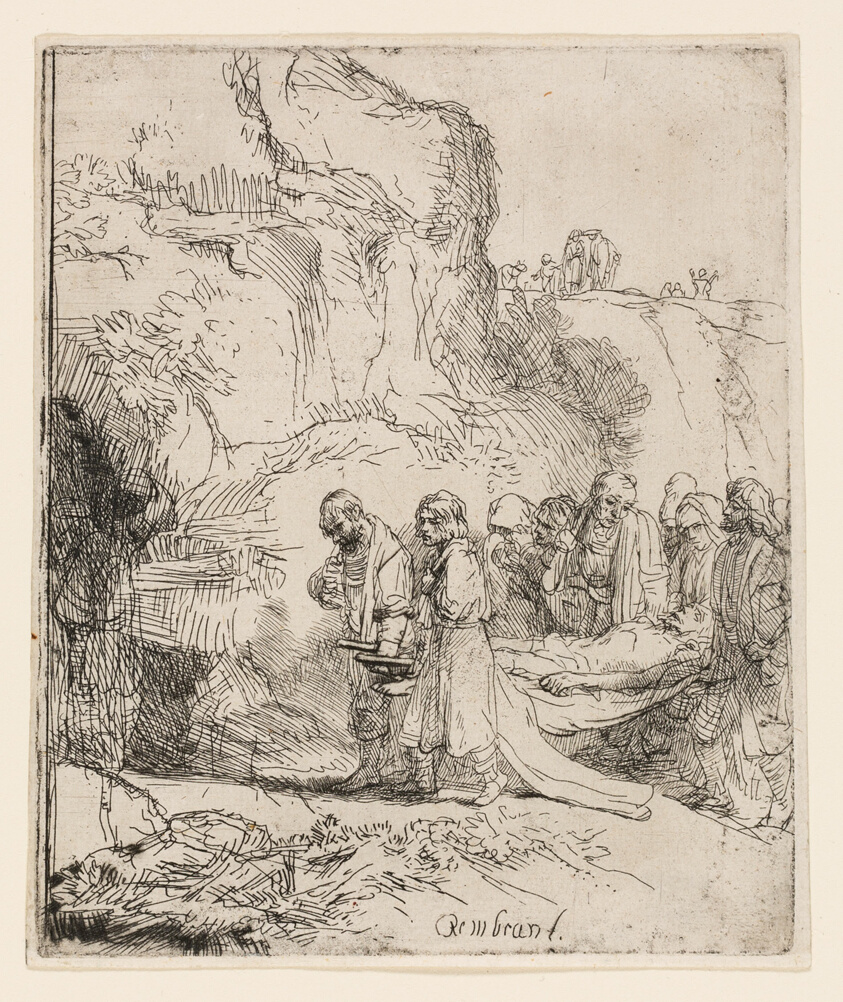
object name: Print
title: Christ Carried to the Tomb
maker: Rembrandt van Rijn (Dutch, 1606-1669)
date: c. 1645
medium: Etching and drypoint on white laid paper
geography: Holland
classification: etching; print; prints and drawing; paper; drypoint